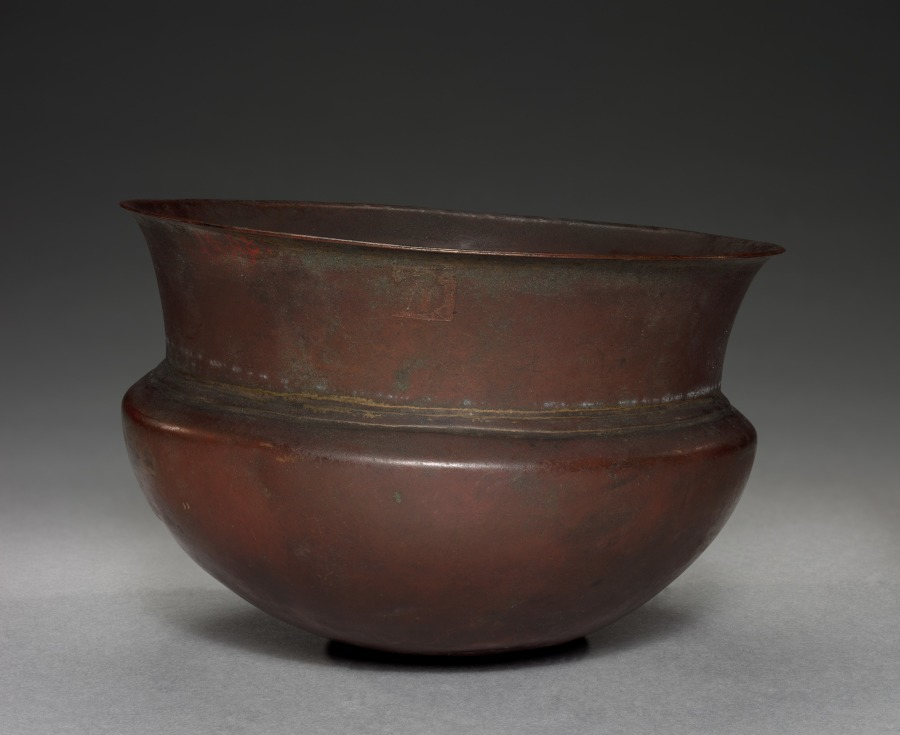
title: Deep Bowl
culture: Egypt, Greco-Roman period (332 BCE–395 CE), Ptolemaic dynasty (305–30 BCE) or modern forgery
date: 305–30 BCE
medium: bronze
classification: Vessels